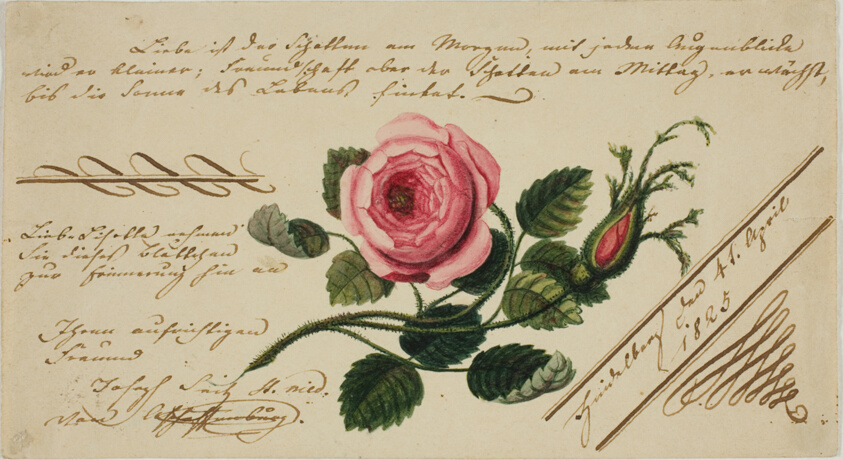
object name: Drawing and Watercolor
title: Untitled Valentine (Pink Flower)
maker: Unknown Artist; German, 19th century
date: 1825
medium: Watercolor and pen and brown ink on buff wove paper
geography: Germany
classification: valentine; prints and drawing; paper